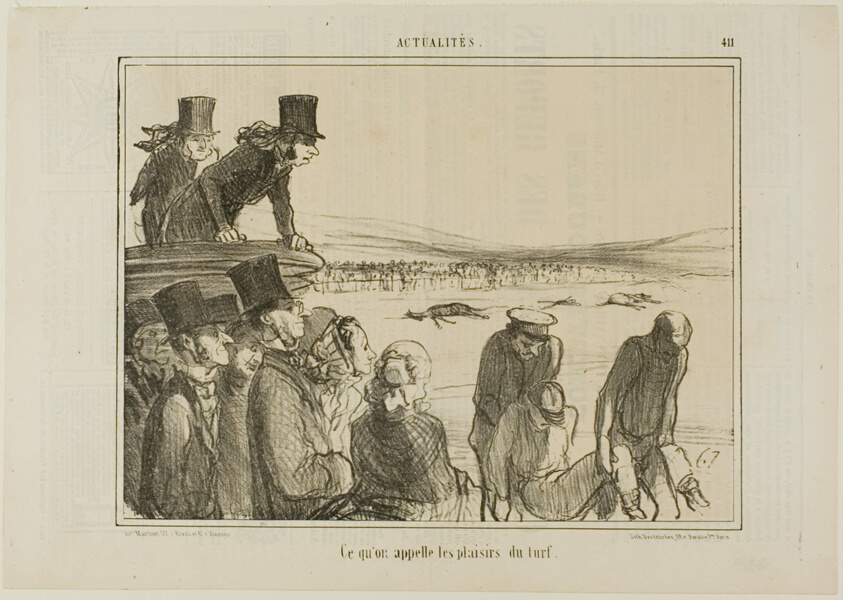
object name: Print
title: These are the joys of horseback racing, plate 411 from Actualités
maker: Honoré Victorin Daumier; French, 1808-1879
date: 1857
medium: Lithograph in black on buff wove paper, with letterpress verso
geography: France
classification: lithograph; print; prints and drawing